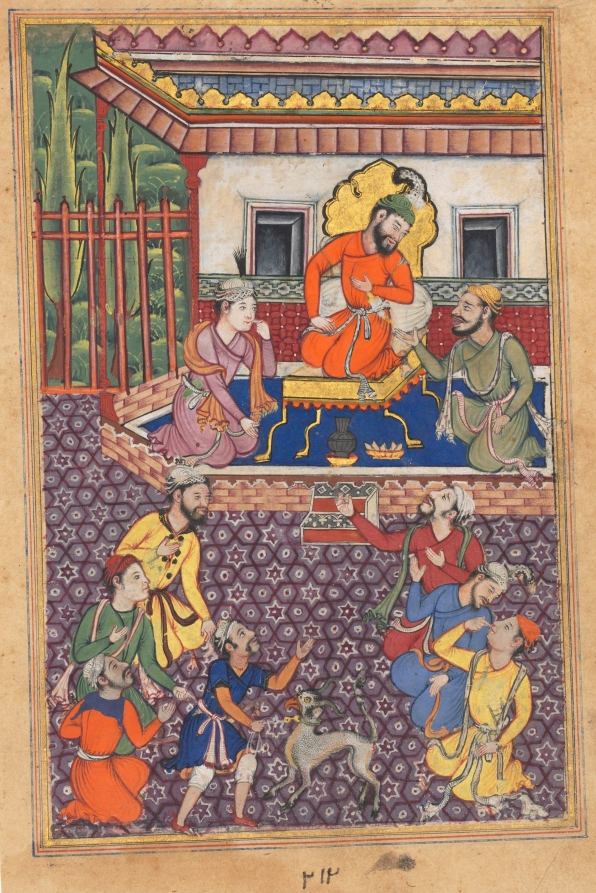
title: The court of the Raja of Ujjain, from a Tuti-nama (Tales of a Parrot): Forty-sixth Night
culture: Mughal India, court of Akbar (reigned 1556–1605)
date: c. 1560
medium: gum tempera, ink, and gold on paper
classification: Painting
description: When out hunting, the formidable raja of Ujjain captured a fantastic animal and brought it back to his court. It is described as being so soft that the fur of his body “made the back of the sable seem as hard as stone and the smoothness of whose coat made the fur of the ermine feel like the anvil of a blacksmith.” In devising this wondrous creature’s appearance, the artist gave him cloven hoofs, a beak, and horns, as though inspired by European images of griffins, but with soft-looking fur.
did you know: The artist of this folio attempted to make the windows on the back wall appear three dimensional.